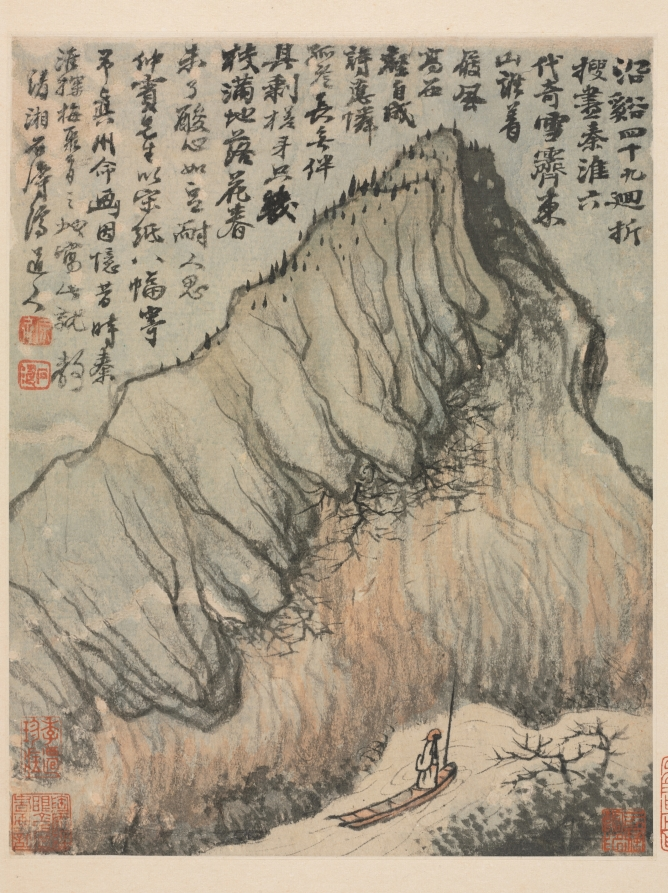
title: Reminiscences of Qinhuai River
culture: China, Qing dynasty (1644-1911)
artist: Shitao (Chinese, 1642–1707)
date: 1642–1707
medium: Album leaf; ink and color on Song paper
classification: Painting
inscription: 沿溪四十九迴折，搜盡秦淮六代奇。/ 雪霽東山誰着屐，風高西壑自成詩。/ 應憐孤冷長無伴，其剩槎牙只幾枝。/ 滿地落花春未了，酸心如豆耐人思。/ 仲賓先生以宋紙十幅寄余真州命畫。因憶昔時秦淮探梅聚首之地，寫此就教。清湘石濤濟道人。[印]原濟; 石濤.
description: This album leaf was probably created in 1695 for a friend Shitao had traveled with to visit ancient sites along the Qinhuai River from the Six Dynasties period. A tiny figure in a boat looks up in awe toward rising mountain masses that form an overhanging cliff, perhaps an image for the overwhelming history of Nanjing. Shitao was born two years before the Ming dynasty fell. A descendant of the first Ming emperor, he later lived in Nanjing, Yangzhou, and Anhui province. Despite his affiliation with the Ming imperial family, he met the Qing dynasty Kangxi emperor twice.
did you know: The figure in the boat scans the cliff seeking a glimpse of a final plum blossom of the season.